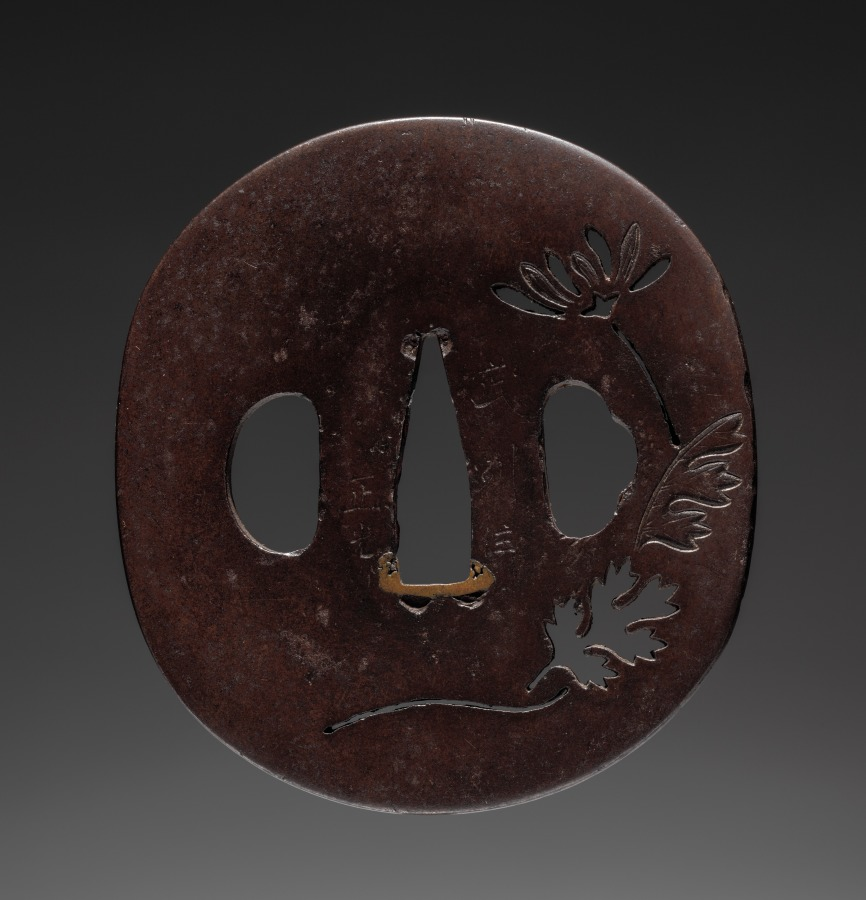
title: Sword Guard (Tsuba)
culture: Japan, Edo period (1615–1868)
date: early 1800s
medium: iron (Akao type)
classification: Arms and Armor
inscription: signed "Masamitsu, residing in Musashi province."